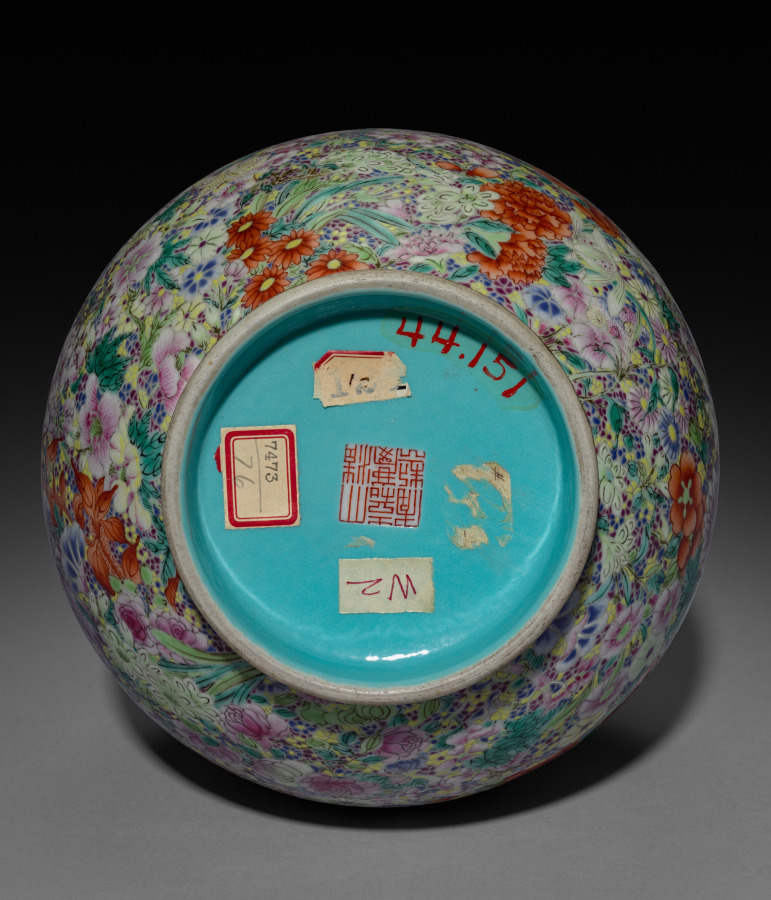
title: Bottle-Shaped Vase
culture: China, Qing dynasty (1644–1911), Jiaqing reign (1796–1820)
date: 1796–1820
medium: Porcelain, overglaze colors and gold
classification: Ceramic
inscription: 大清嘉慶年制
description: This vase is densely decorated with peonies, morning glories, lilies, and lotuses. Purple, yellow, and blue petals fill the surface, forming a continuous millefleur (thousand-flower) pattern. Each petal is delicately shaded to suggest volume and depth, creating a vivid yet orderly composition. The mouth is painted with gold pigment to imitate metal, evoking the appearance of copper-body-painted enamel as seen in Qing dynasty court art. Qing palace records indicate that vases with such patterns were used in everyday flower-viewing displays. In late Qing inventories, comparable examples were listed as furnishings for the emperor and his consorts.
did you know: Porcelain with this dense floral millefleurs decoration and a multitude of overglaze enamel colors was first made in the Qing dynasty and remained popular into the late 1800s.